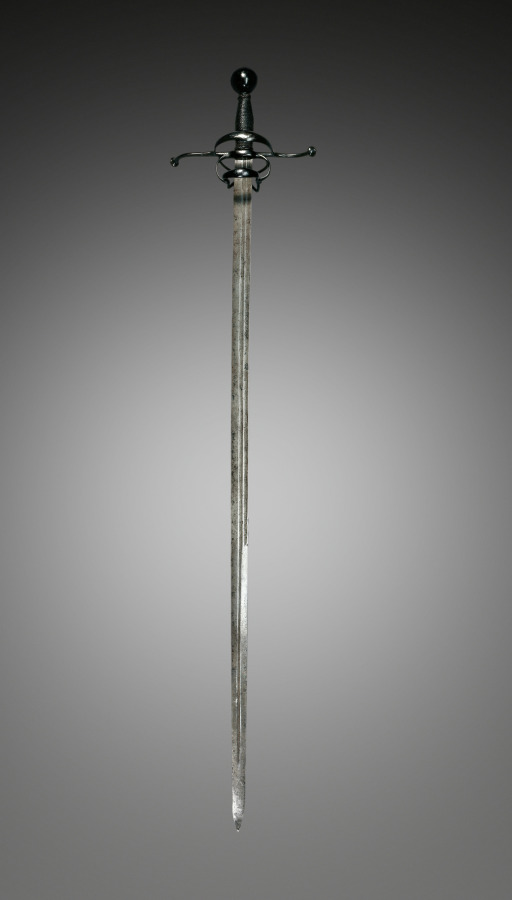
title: Rapier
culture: Germany, early 17th Century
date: c. 1610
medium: steel; hilt of deeply blued steel; wood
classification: Arms and Armor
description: The rapier was a sword worn with civilian dress and used in duels. The term rapier derives from the 16th-century French word rapière, which in turn was derived from the Spanish espada ropera, or “dress sword.” The rapier was a light weapon with a straight double-edged and pointed blade that, with the development of the art of fencing in the 1500s and 1600s, gradually became narrower and lighter, and thus suitable for thrusts only. With the new technique of swordplay emphasizing the point of the blade, sword guards became more complex to protect the duelist’s unarmored hand. These elaborate guards were frequently decorated by various techniques—chiseling, bluing, russeting, and damascening.